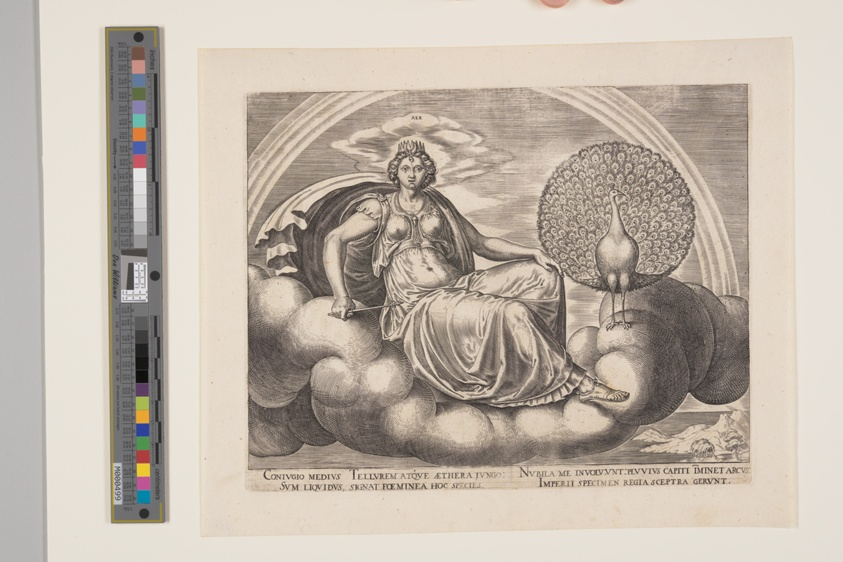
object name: Print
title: Air, from The Four Elements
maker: Philip Galle; Flemish, 1537–1612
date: 1564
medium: Engraving on ivory laid paper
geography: Flanders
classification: engraving; paper; print; prints and drawing